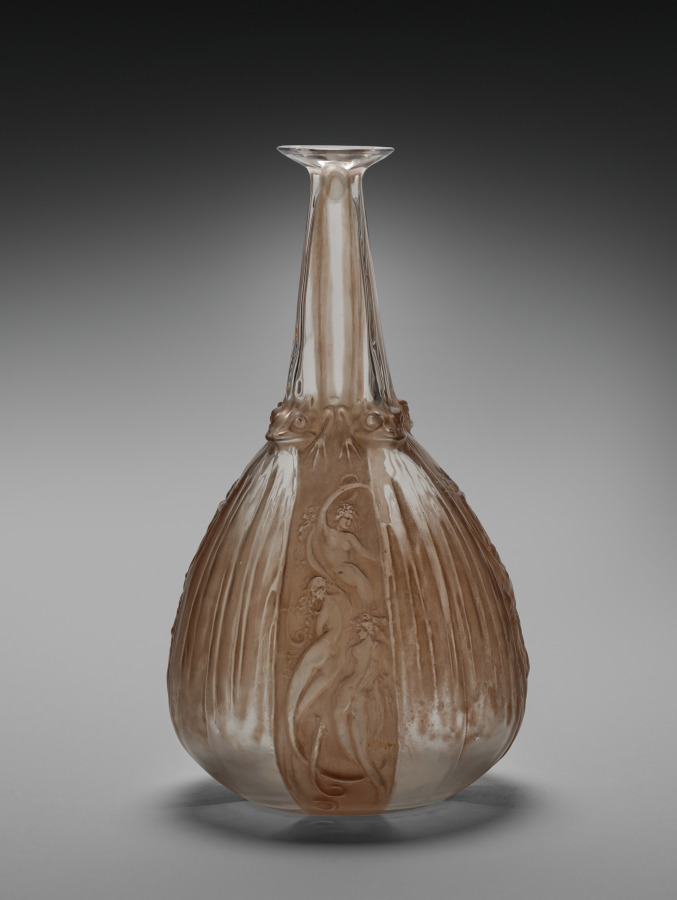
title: Mermaids and Frogs Decanter (Carafe sirènes et grenouilles)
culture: France, 20th century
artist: René Lalique (French, 1860–1945)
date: 1917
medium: glass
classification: Glass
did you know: The title of this work translates to mermaids and frogs carafe.